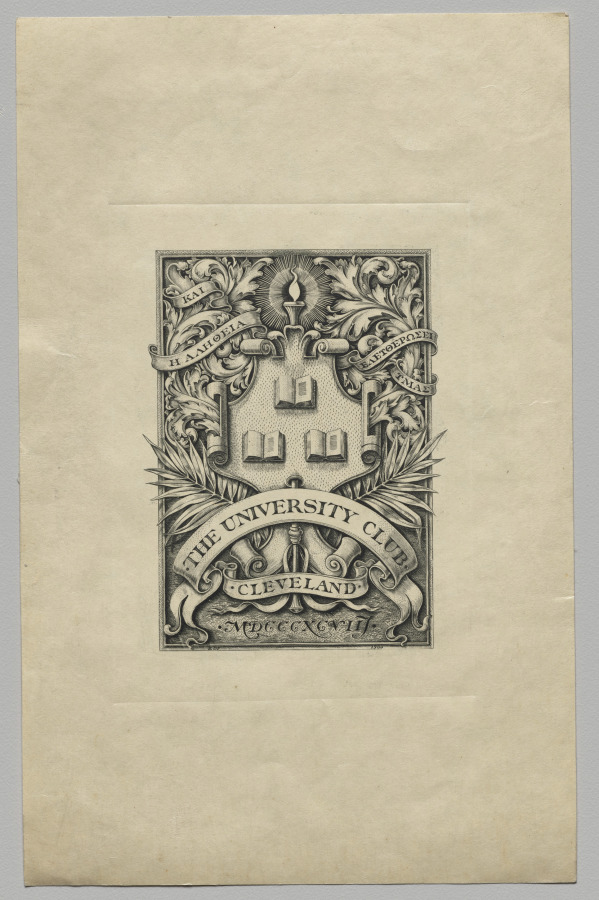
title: Bookplate: The University Club, Cleveland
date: 1900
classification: Print